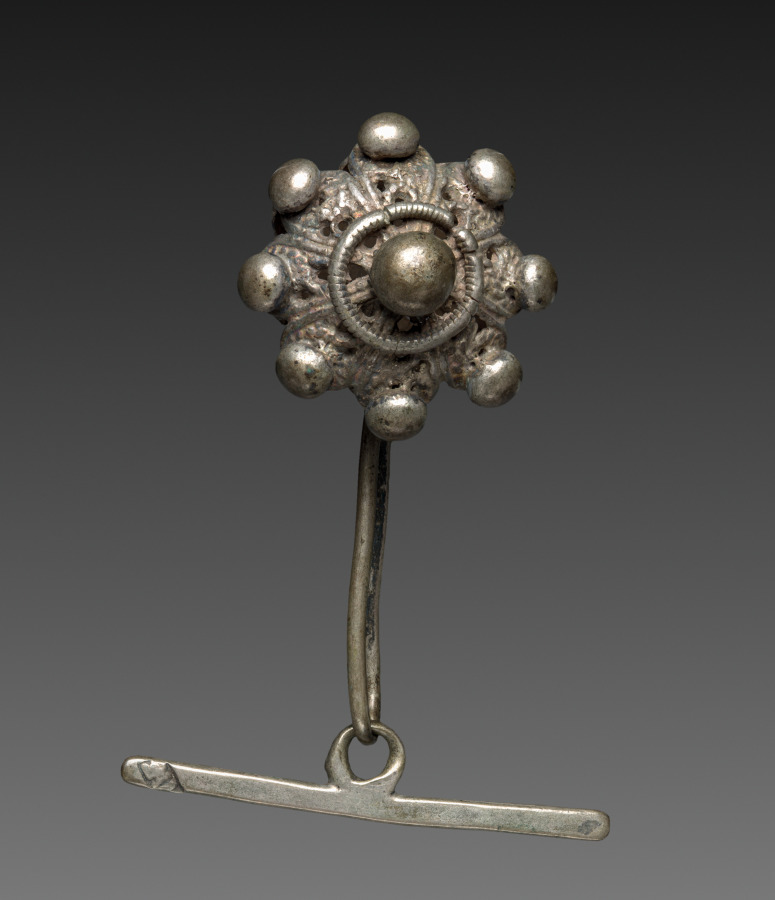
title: Button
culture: Italy, Sardinia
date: 1800s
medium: silver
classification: Jewelry